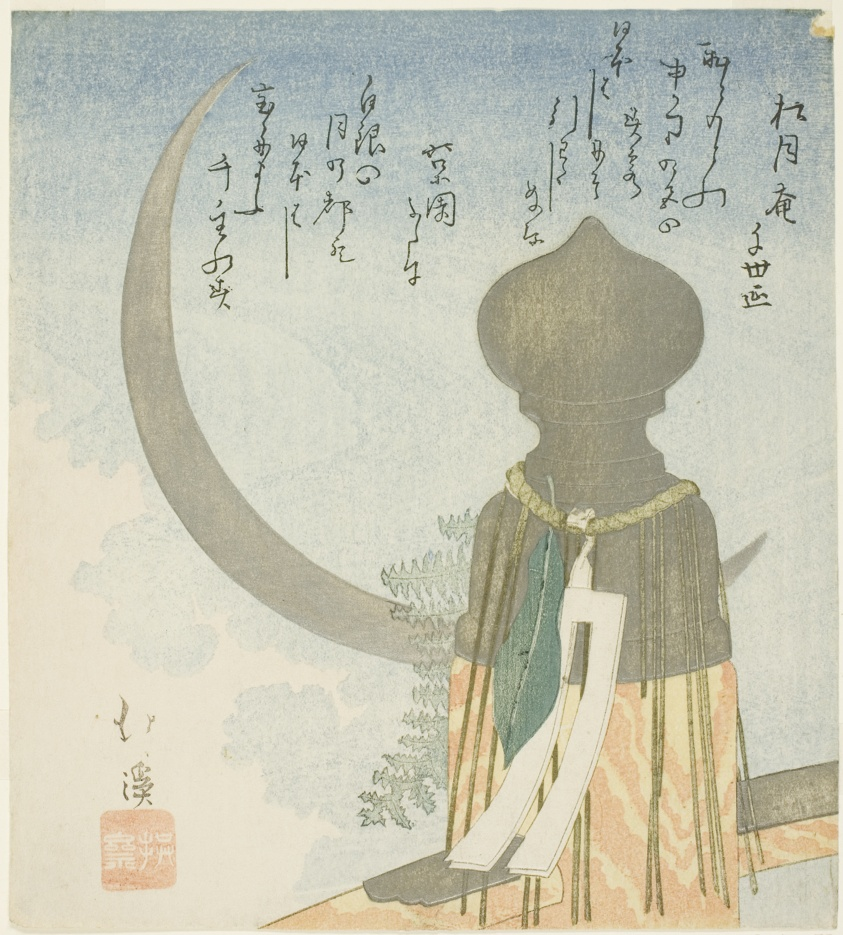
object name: Print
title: Bridge post and crescent moon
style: Japanese (culture or style)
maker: Totoya Hokkei (Japanese, 1780-1850)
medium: Color woodblock print; shikishiban, surimono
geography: Japan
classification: woodblock print; print; asian art